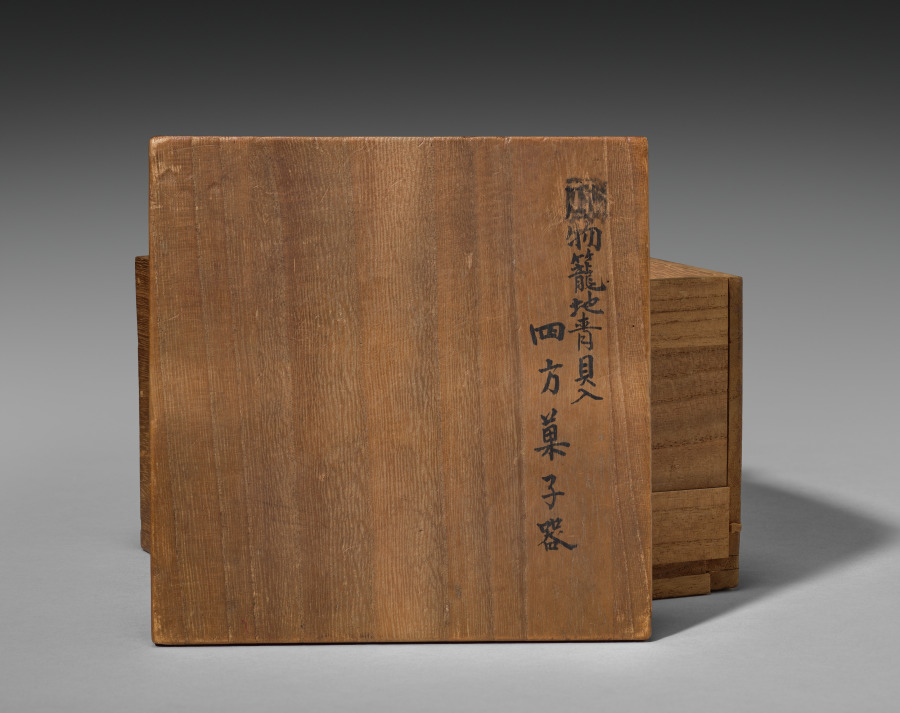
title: Wickerwork Box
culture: China, Ming dynasty (1368-1644), Wanli reign (1572-1620)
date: 1609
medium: lacquered wickerwork (of woven bamboo) framed in wood with circular scene inlaid in mother-of-pearl and gold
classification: Lacquer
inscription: Inscription at bottom in red on black lacquer reads: "commissioned by Yü-Yün-ch'i".